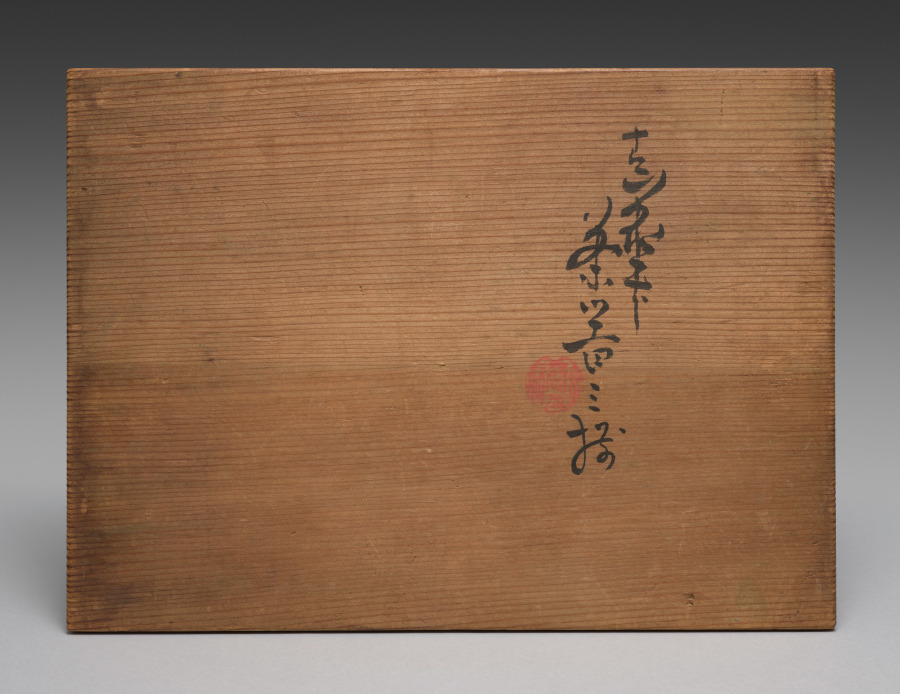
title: Tea Set with Chinese Landscapes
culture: Japan, Meiji period (1868–1912)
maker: Seifū Yohei III (Japanese, 1851–1914)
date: 1893–1914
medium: Tea set with tea pot, hot water cooler, and five cups; porcelain with underglaze blue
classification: Ceramic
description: The theme of this sencha tea set is the Chinese scholar-recluse in an idyllic landscape. The teapot depicts two friends playing a board game on a promontory beyond a two-storied residence, while another figure comes across the entry bridge bearing bags of provisions, hung from the ends of a pole balanced across his shoulders. The kidney-shaped water cooler has a scene of a man gazing at a full moon in a dramatic mountain-scape stretching before a large compound in the woods. Another man, hunched over and carrying a heavy parcel tied to a pole over his shoulder, struggles to make his way up a hill to the site. The cooler also has a pair of applied nyoi staff-head forms for resting the tips of one’s thumb and index finger, like those on the water cooler with pine trees (see [19 ]). Each of the five teacups has a landscape with an architectural structure and some human activity. One cup shows a man with a staff walking away from a residence toward a boat, loaded with what might be a musical instrument wrapped for travel. A second cup shows a man rowing a little skiff, which disturbs the otherwise still water. Behind him in the distance is an open-air pavilion. He is making his way toward a pair of figures playing a board game, much like the scene on the teapot. Down the hill from them is a residence; beyond this, a flock of geese approaches through the sky. A third cup shows a man in a traveling robe leaning upon his staff as he crosses a bridge to reach a two-story building with a pitched roof, possibly a temple, set between trees. Past this structure, another man sits fishing in a boat. A fourth cup shows a humbly dressed man with a broad-brimmed hat lugging a package tied to the end of a rod slung over his shoulder. In front of him is a two-story building flanked by deciduous trees and a man resting against the side of a sturdy stone bridge as he looks at a residence, or perhaps a set of roofed gates, further up the path. The last cup has a man walking toward a group of three pavilions announced with a banner hanging from a tall post; beyond this are two large deciduous trees sheltering a stand of small conifers. Across the water from this site is another man sitting on the bank fishing with a large woven basket for his catch beside him.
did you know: Images of famous sencha events that shows that these kinds of porcelains fit with objects, such as a stove and kettle, to form a complete set of utensils for tea preparation, and with ensembles of decorative objects meant to inspire creativity.